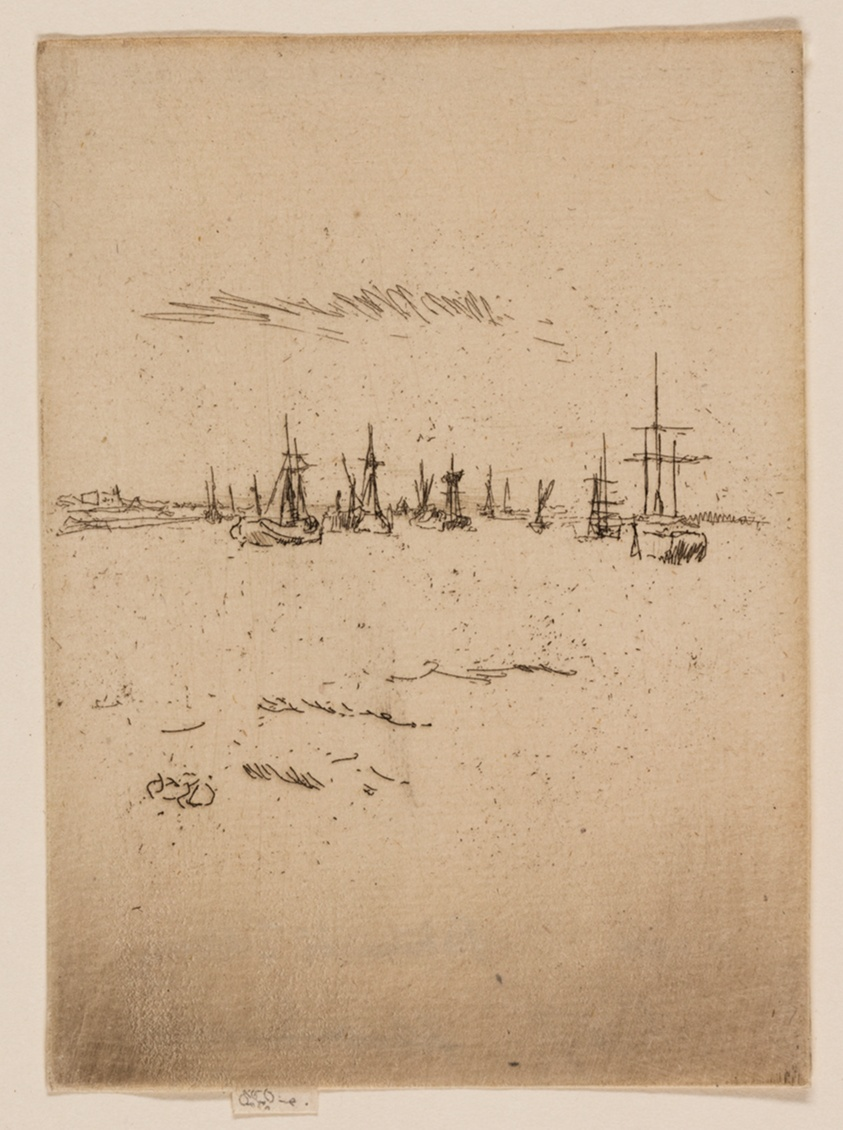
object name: Print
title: Return to Tilbury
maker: James McNeill Whistler (American, 1834-1903)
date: 1887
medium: Etching and drypoint with foul biting in black ink on cream laid paper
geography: United States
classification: etching; foul biting; print; prints and drawing; drypoint; paper